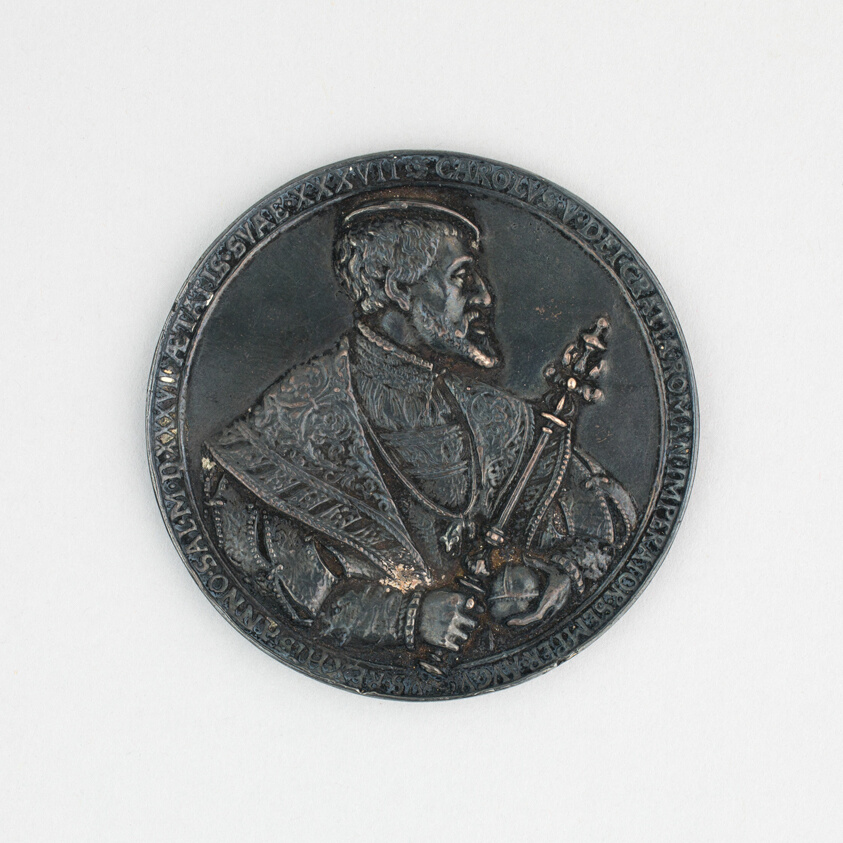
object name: Medals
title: Medal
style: 18th Century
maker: Artist unknown (European, active 18th century)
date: 18th century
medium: Silver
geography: Europe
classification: medal; jewelry; european decorative arts; metal; portrait; silver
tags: medals, jewelry, man, nobility, eagle with shield, coat of arms, kings, portrait, portraits, portraits: male subject, royal, royalty, Spain, wealth